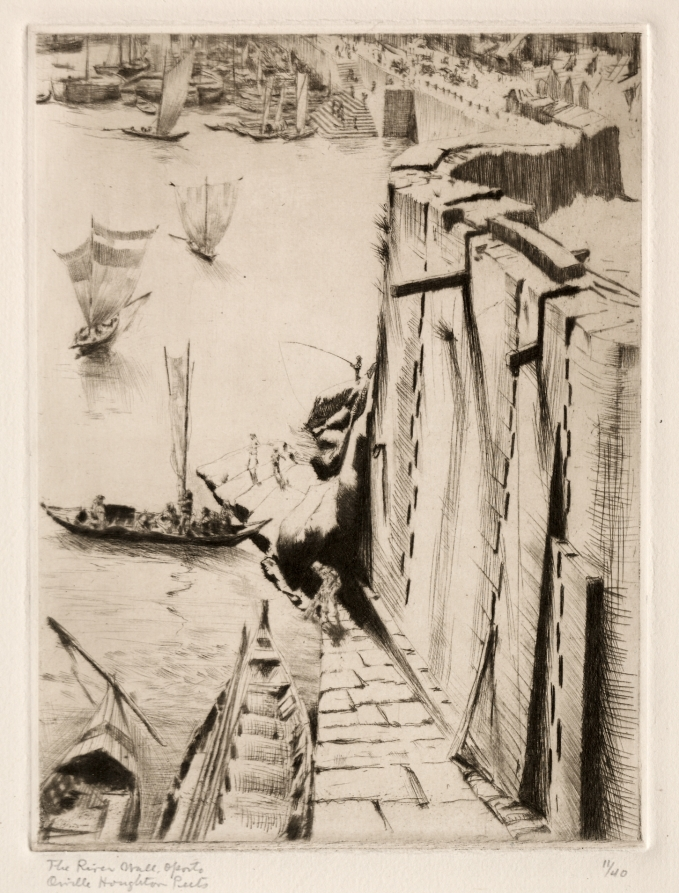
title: River Wall, Oporto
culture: America, Ohio, Cleveland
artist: Orville Houghton Peets (American, 1884–1968)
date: before 1926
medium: etching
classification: Print